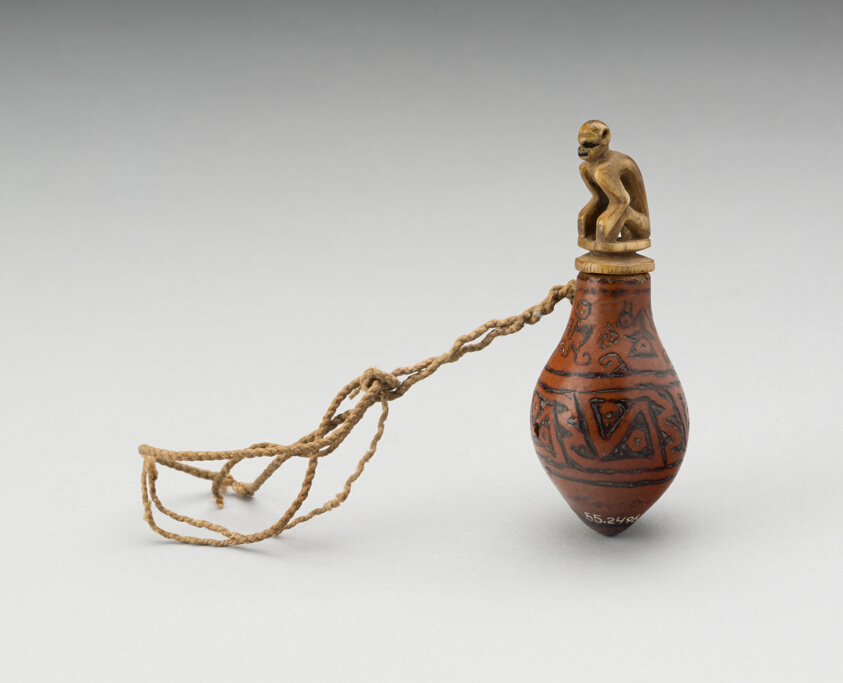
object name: Decorative Arts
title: Incised Container for Lime with Monkey Stopper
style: ica, Arts of the Americas, peruvian, south american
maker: Probably Ica; South coast, Peru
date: 1000–1470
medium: Gourd with string [and bone stopper]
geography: Peruvian South Coast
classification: fauna/flora/fruit; american decorative arts; container; decorative arts; art of the americas